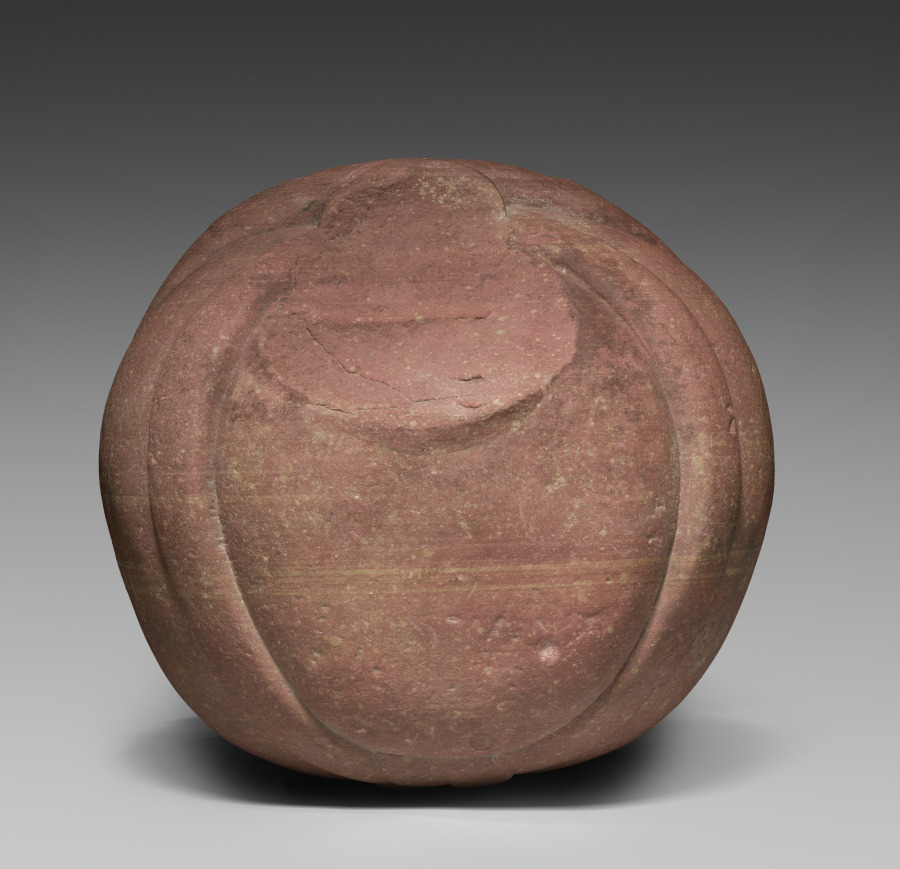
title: Head of a Yaksha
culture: Northern India, Uttar Pradesh, Mathura, Shunga period (185–78 BCE)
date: c. 125 BCE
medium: mottled red sandstone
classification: Sculpture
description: Colossal statues of yakshas, male divinities who personify the productive forces of nature, were especially popular in the northern Indian region around the ancient city of Mathura. They were installed in shrines in parks and gardens, often associated with extraordinary trees. The red sandstone is from a nearby quarry, called Sikri.